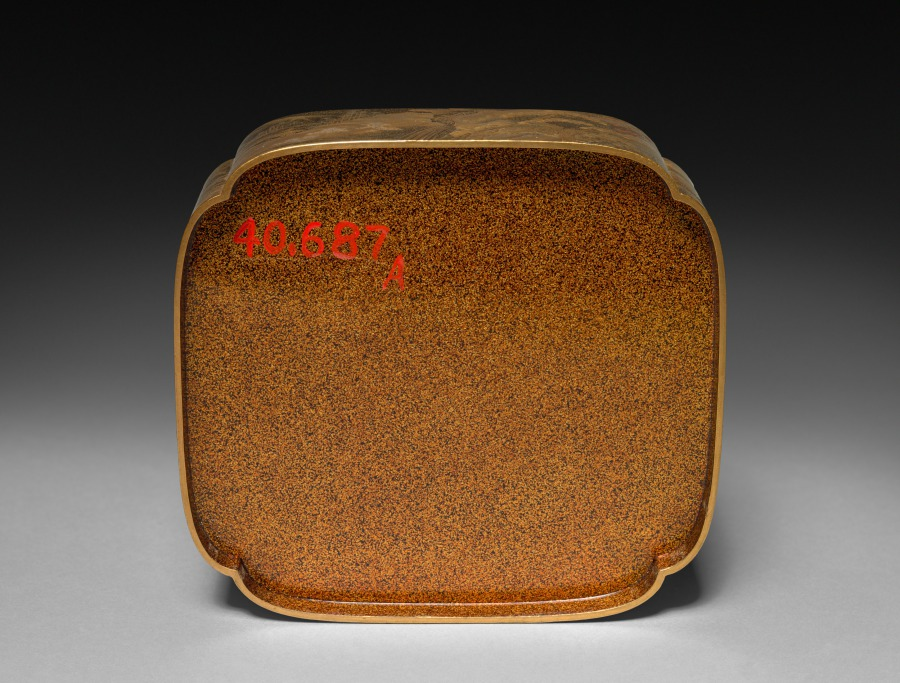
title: Box (middle)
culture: Japan, Meiji period (1868–1912)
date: late 1800s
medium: wood with lacquer and gold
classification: Lacquer